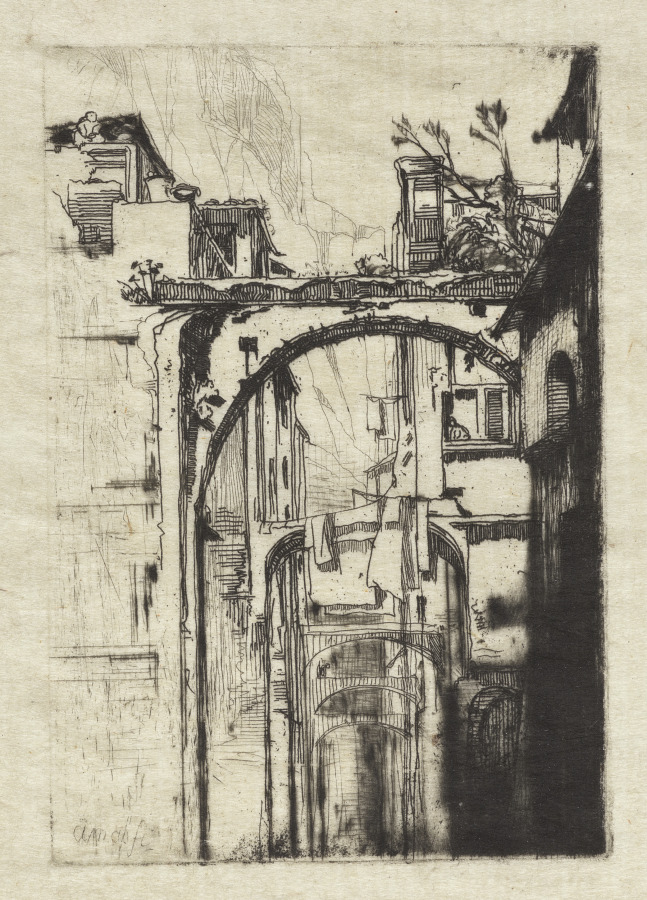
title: Amalfi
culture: England, 19th century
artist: Francis Seymour Haden (British, 1818–1910)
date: 1844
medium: etching and drypoint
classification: Print